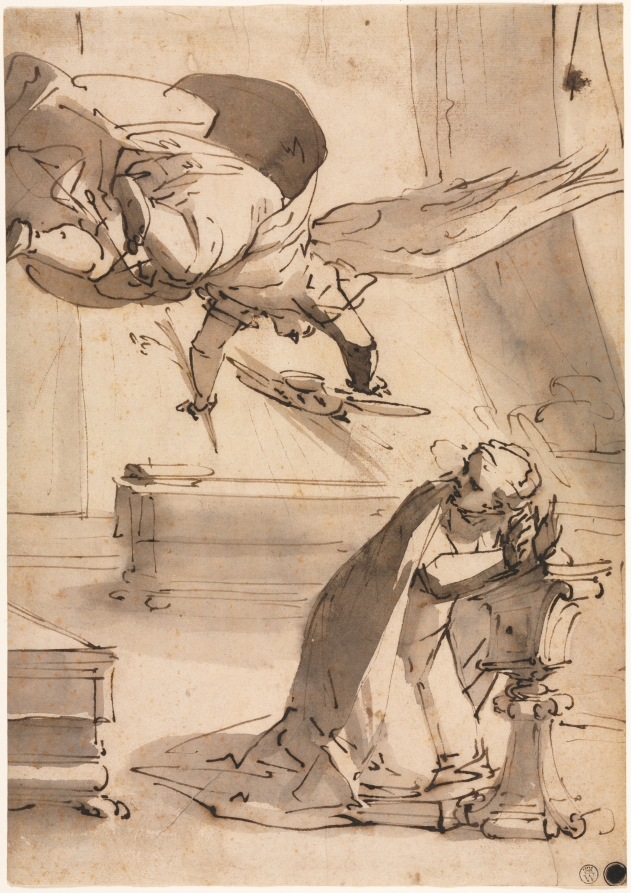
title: The Annunciation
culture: Italy, 16th century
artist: Luca Cambiaso (Italian, 1527–1585)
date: c. 1568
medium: pen and brown ink (iron gall) and brush and brown wash over traces of black chalk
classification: Drawing